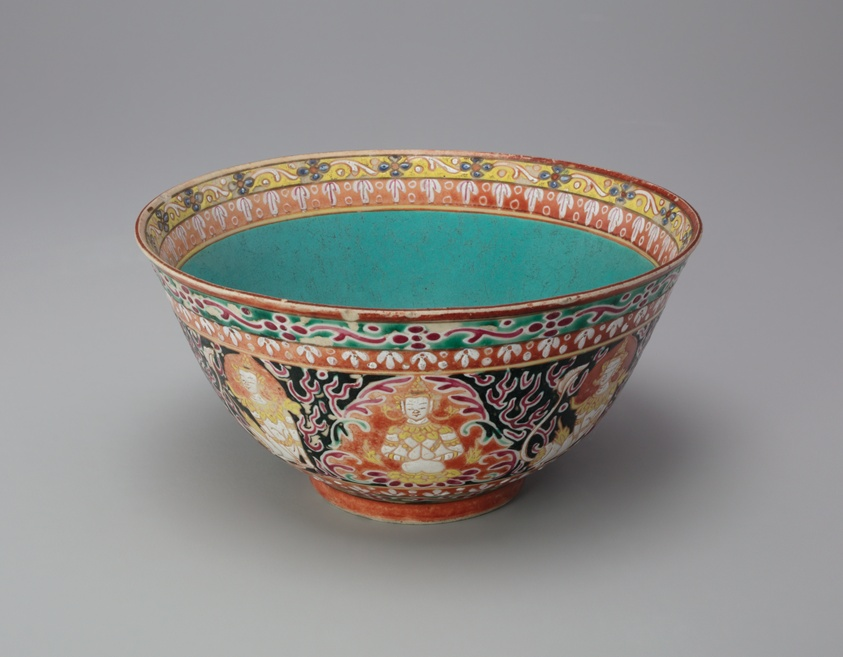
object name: Vessel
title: Bencharong (Five-Colored) Ware, Bowl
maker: China, for the Thai Market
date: 19th century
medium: Porcelain painted in overglaze polychrome enamels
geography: China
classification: porcelain; asian art; ceramics; vessel